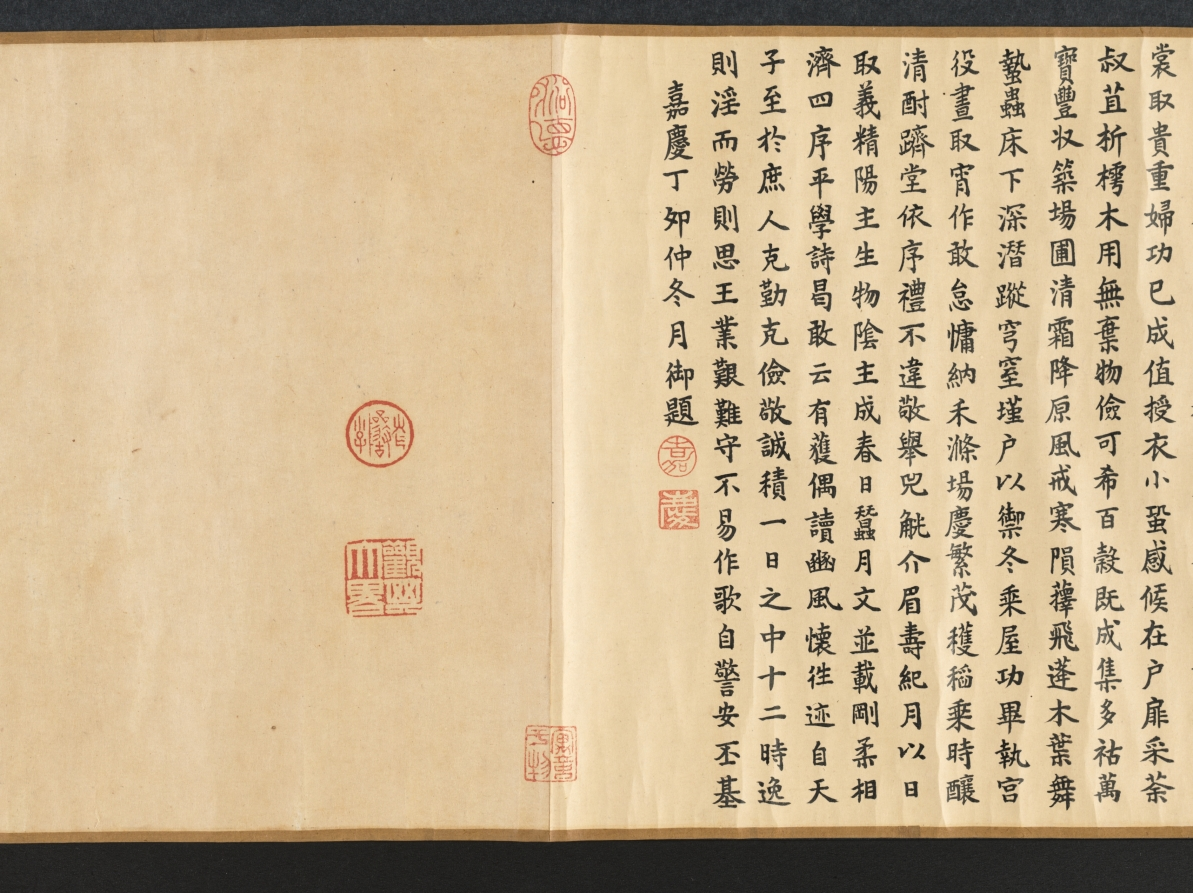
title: "Seventh Month" from the Odes of Bin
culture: China, Southern Song dynasty (1127-1279)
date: 1200s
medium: Handscroll; ink and color on silk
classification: Painting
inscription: Colophons: 1. [on the frontispiece] by the Qianlong emperor (dated 1741). 2. by Lu Wan (dated Zhengde dingchou, 1517). 2. by the Jiaqing emperor (dated 1807).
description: According to Confucian thought, the ruler looks after the well-being of his people which involves agricultural activities. Seventh Month from the ancient Odes of Bin in the Shijing (Book of Poetry) describes occupations throughout the year, including plowing, harvesting, hunting, making clothes, and observing rituals. The earliest illustrations of these Odes accompanied by text were commissioned by Southern Song emperor Gaozong (reigned 1127–1162). As the lower Yangzi delta had become the new seat of government, Gaozong had sets of these illustrations produced by court artists to revive the dynasty and convince the Confucian officialelite of his legitimacy to rule.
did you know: The Odes of Bin appears in the classic Shijing (Book of Poetry), an anthology of more than 300 poems, folk songs, and ceremonial hymns that were originally chanted to music.